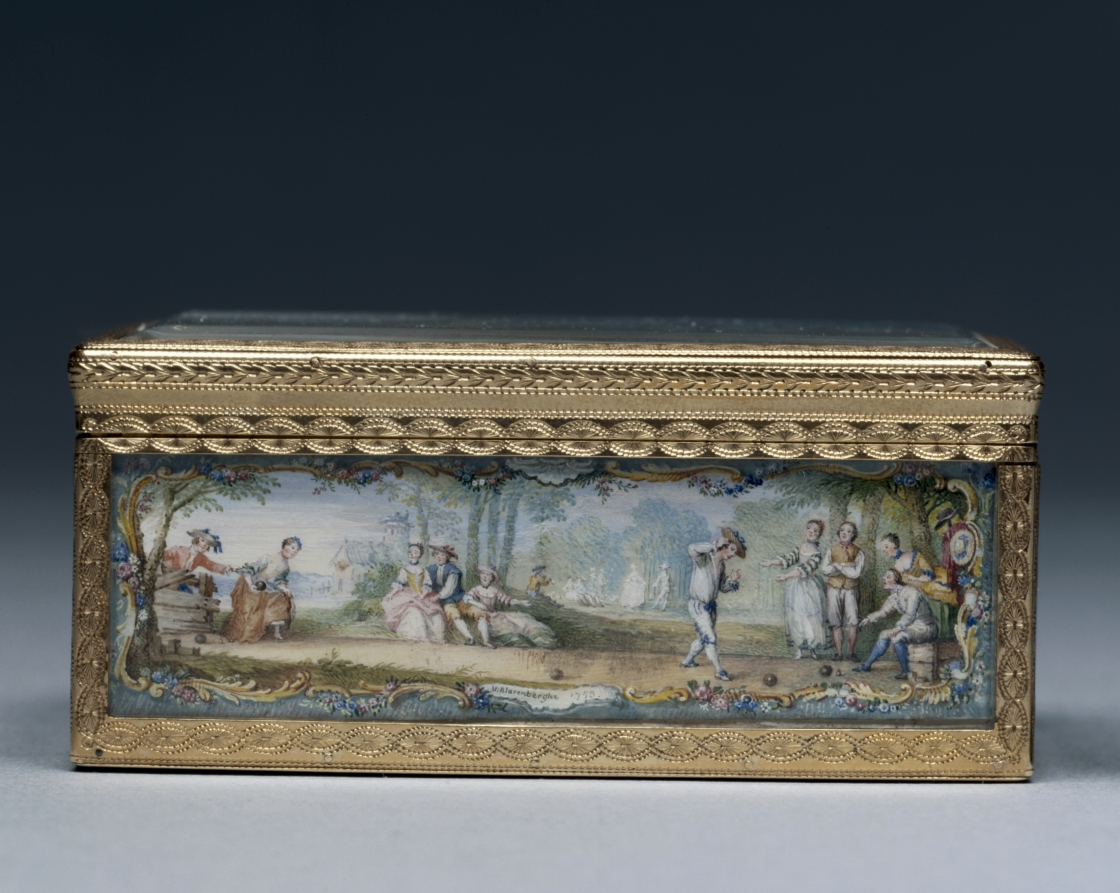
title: Snuff Box (Tabatière)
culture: France, 18th century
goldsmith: Jean Ducrollay (French, 1709–1787)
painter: Louis Nicolas van Blarenberghe (French, 1716–1794)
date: 1753–54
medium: gold and glass with miniatures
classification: Metalwork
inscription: [Maker's mark of Jean Ducrollay, master goldsmith in 1734, inside cover; bottom; right side]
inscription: [Charge mark of Julien Berthe, Paris, 1750-1756, inside cover; bottom; right side]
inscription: [Discharge mark of Julien Berthe, Paris, 1750-1756, on bezel]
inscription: [Inscribed on miniature, front side]: "V.[an] Blarenberghe/1753"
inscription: [Warden's mark for Paris, 1763-1754, inside cover; bottom; right side]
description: In 18th-century France ornately enameled boxes that held snuff—powdered tobacco—became a popular accessory in the French court. This object’s rectangular shape differs from early work attributed to Jean Ducrollay. Though the light colors, floral borders, and depictions of lively outdoor recreation are representative of earlier rococo imagery, the rectangular shape and simple frieze make it a primary example of rising neoclassicism.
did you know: The Ducrollay family was one of the most sought-after Parisian goldsmith workshops under the reign of French King Louis XV.